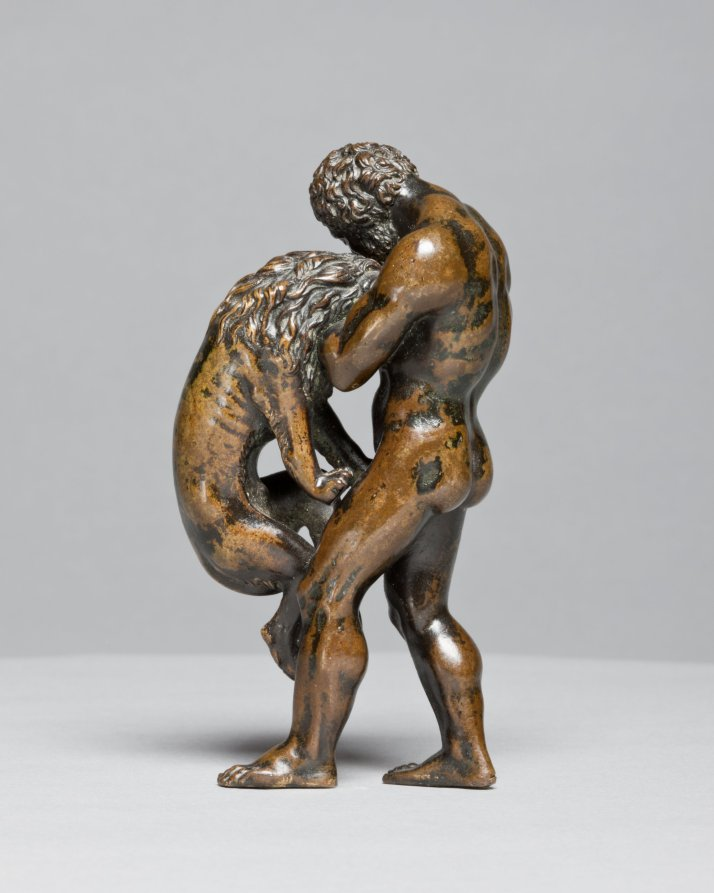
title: Hercules and the Nemean Lion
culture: Italy or France, 16th century or later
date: 1500s or later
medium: bronze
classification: Sculpture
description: The original owner of this work would have understood that this scene referred to the entire story of Hercules, the demi-god who had to accomplish twelve labors. The lion is named after the city of Nemea, near Corinth, a monstrous beast sent by the goddess Hera to wreak havoc on the area. After killing the lion, Hercules wore his pelt, commonly seen in other representations of the hero.